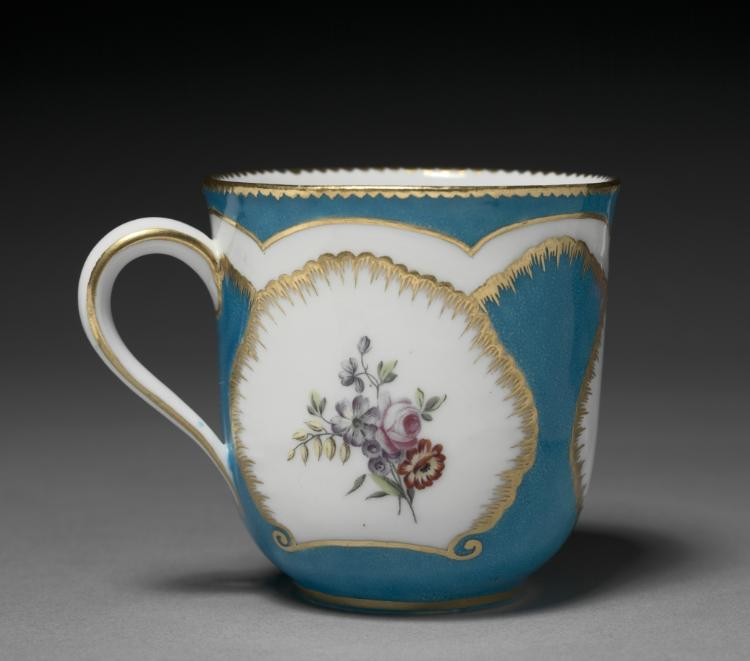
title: Cup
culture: France, Sèvres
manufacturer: Sèvres Porcelain Factory (French, est. 1756)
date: 1759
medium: soft-paste porcelain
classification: Ceramic